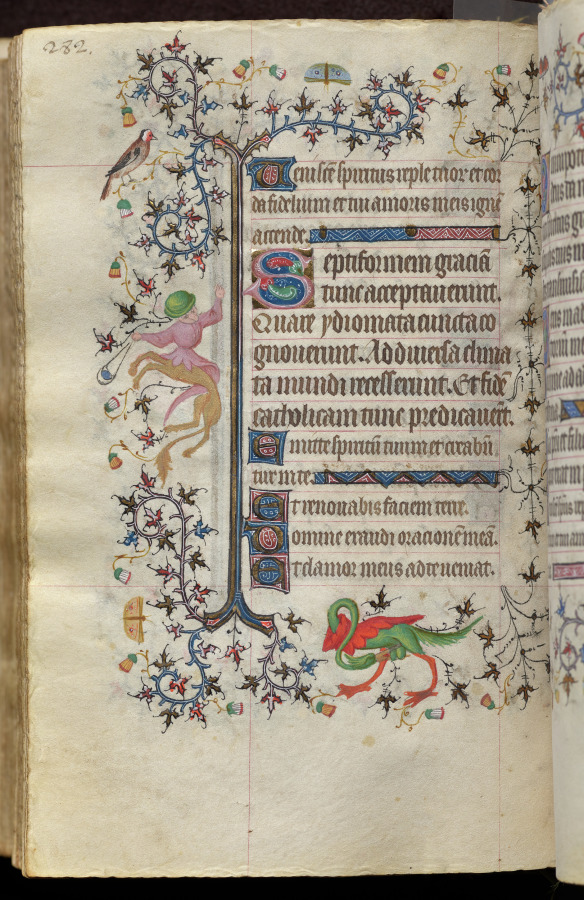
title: Hours of Charles the Noble, King of Navarre (1361-1425): fol. 141v, Text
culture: France, Paris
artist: Master of the Brussels Initials and Associates (French)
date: c. 1405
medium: ink, tempera, and gold on vellum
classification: Bound Volume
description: This precious volume was obviously highly prized by its owner, the French-born King of Navarre, who had his coat of arms painted on no less than twenty folios. Rather than directly commissioning this manuscript from a specific workshop, it seems that Charles the Noble acquired his book of hours -- perhaps ready-made for the luxury market -- while on a trip to Paris in 1404-05. A collaborative effort, six painting styles are evidenced within the pages of this codex, those of two Italians, two Frenchmen, and two Netherlanders. The painter who was responsible for the planning and decoration of the book, and who produced seventeen of the large miniatures, was a Bolognese artist known as the Master of the Brussels Initials. His principal assistant, responsible for most of the borders, was a Florentine who signed his name "Zecho" da Firenze on folio 208 verso.